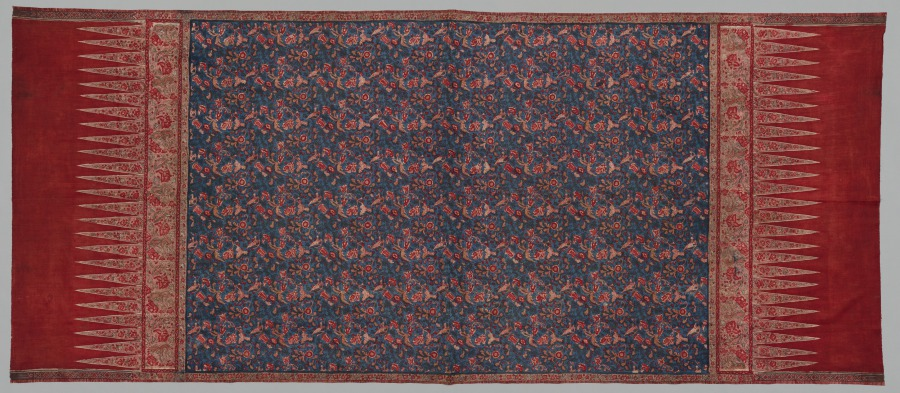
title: Hip Wrapper (tapis)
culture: India, Coromandel Coast, 1st half 19th Century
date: 1800–1850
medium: cotton; plain weave; block printed, drawn resist, painted mordants, dyed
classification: Textile